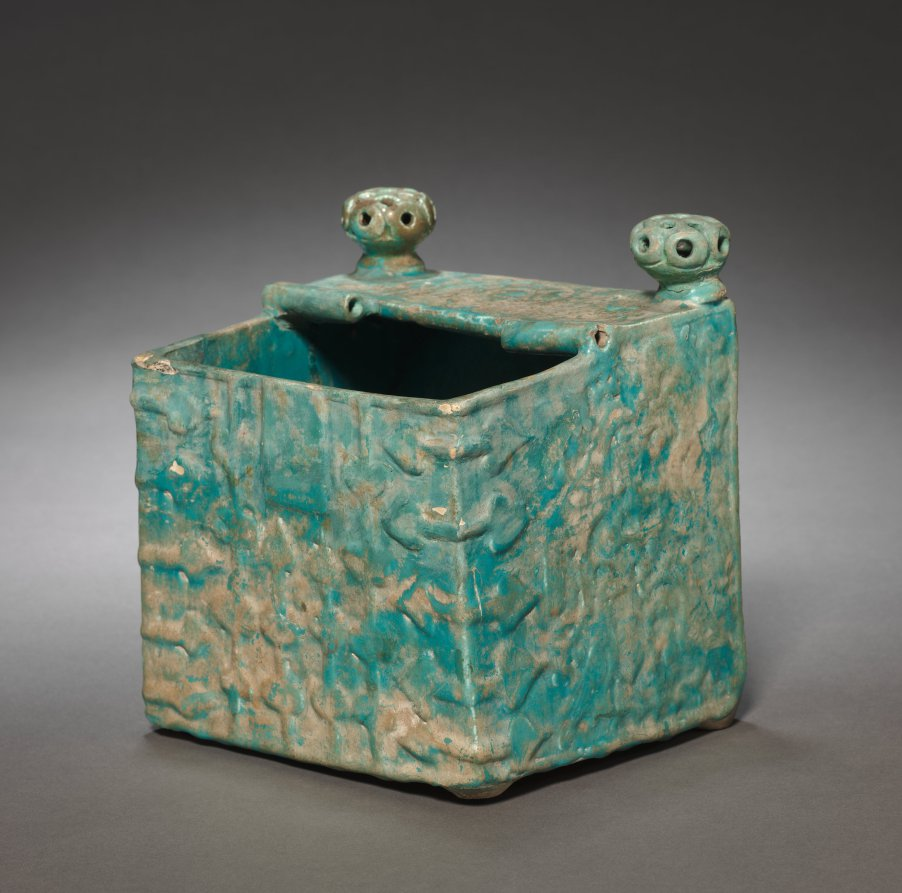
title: Casket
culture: Syria (Raqqa), Ayyubid Period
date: late 1100s–1200s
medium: fritware with molded design under glaze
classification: Ceramic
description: This square fritware box originally had a with hinged top. It is covered on the inside and outside with opaque turquoise glaze. The top back corners of the casket are surmounted by small openwork knobs. The casket would have rested on four feet, which have been lost. This is a ceramic imitation of a wooden box with metal fittings. The relief ornament imitates metal straps and a lock fitting.